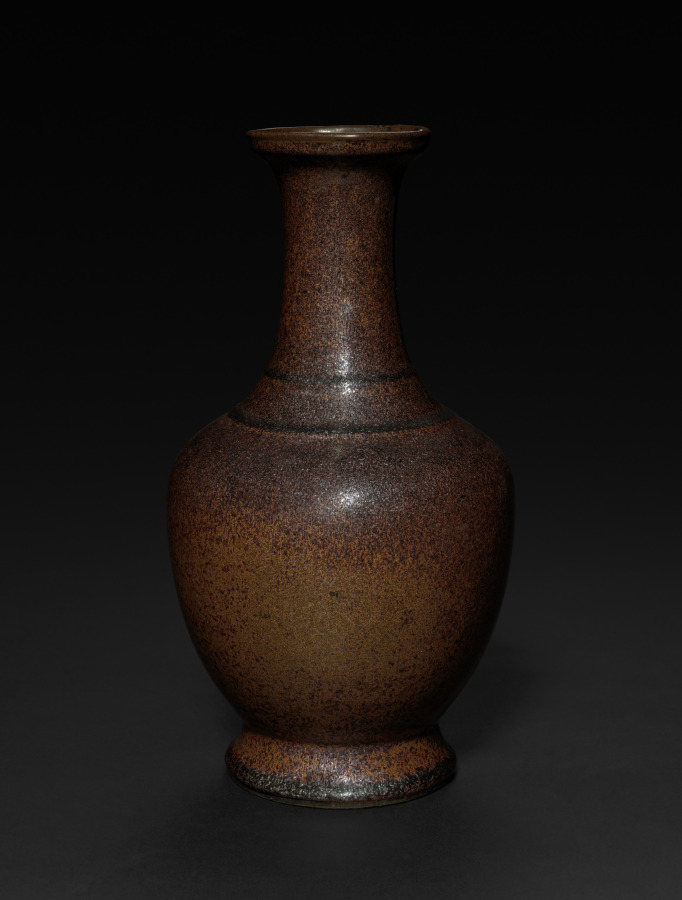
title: Vase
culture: China, Qing dynasty (1644–1911), Qianlong reign (1736–95)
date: 1736–95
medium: porcelain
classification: Ceramic